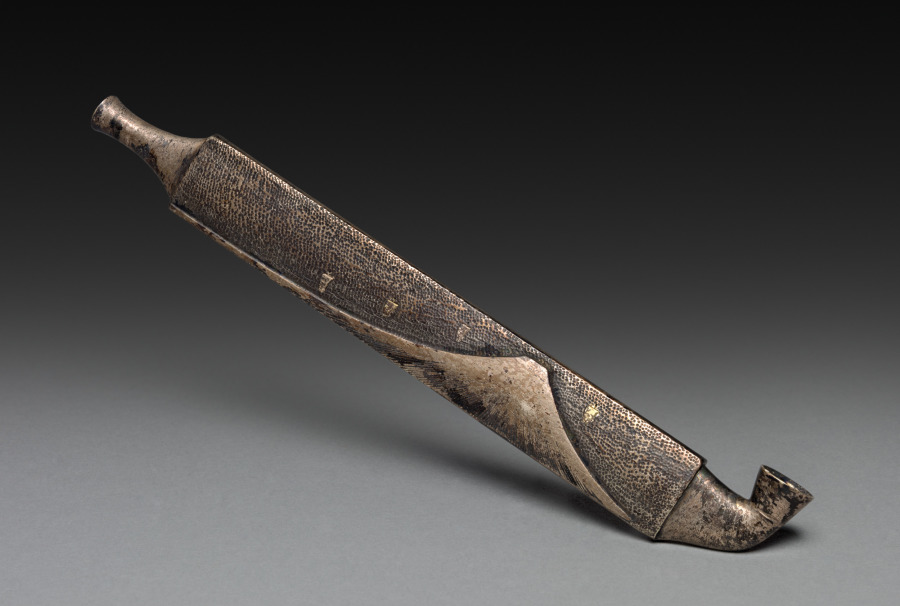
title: Tobacco Pipe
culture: Japan, Edo period (1615–1868)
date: early to mid-1800s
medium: silver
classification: Miscellaneous